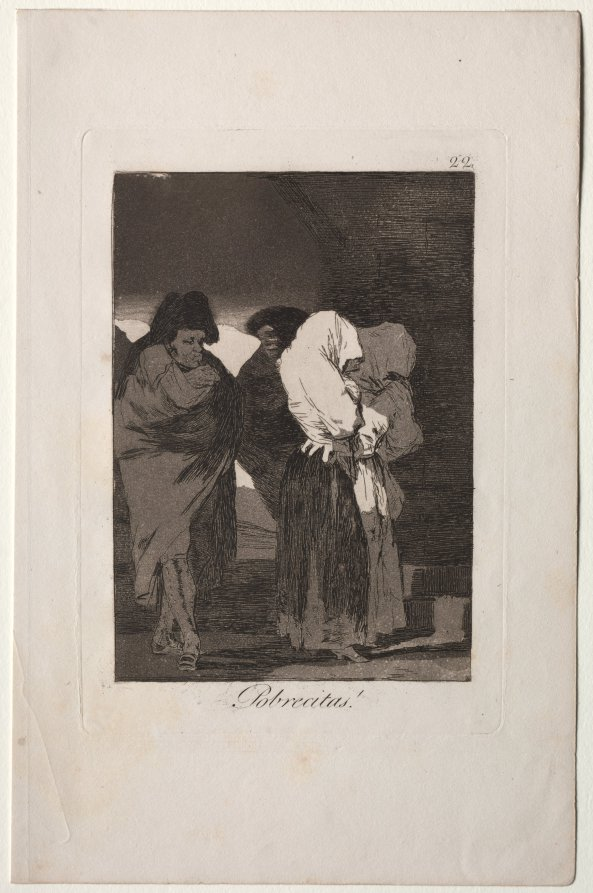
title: Poor Little Girls!, Plate 22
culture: Spain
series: Los Caprichos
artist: Francisco de Goya (Spanish, 1746–1828)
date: 1799 (printed c. 1855)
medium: etching and aquatint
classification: Print